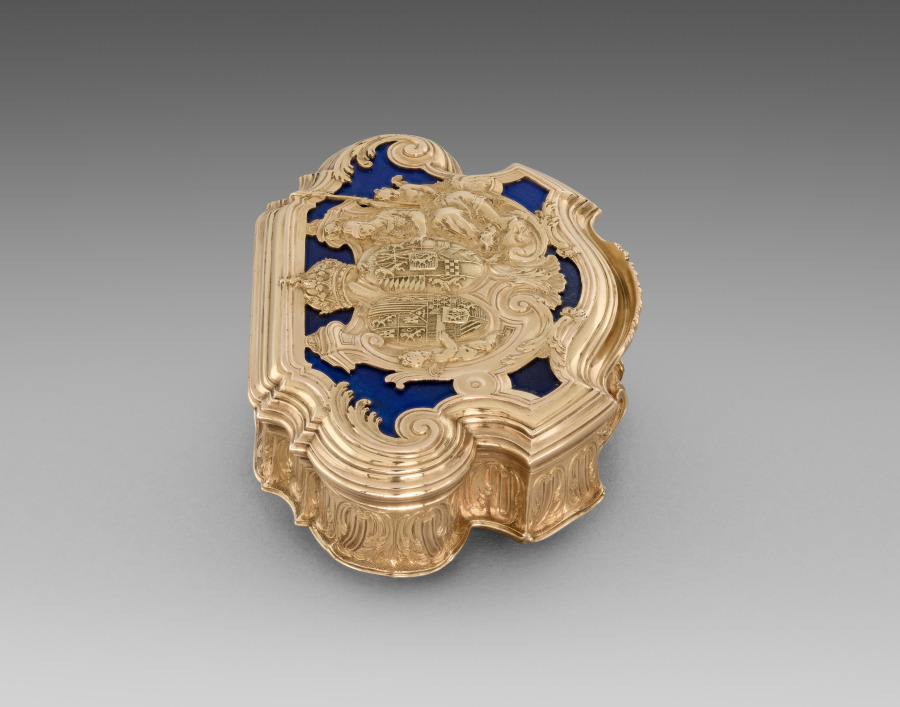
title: Gold Box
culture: France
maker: Juste-Aurèle Meissonnier (French, 1695–1750)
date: 1728–29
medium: gold and lapis lazuli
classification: Metalwork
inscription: IOM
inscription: a crowned M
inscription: a crowned dolphin's head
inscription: a crowned chancellor's mace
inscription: double frame eagle's head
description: With its central cartouche, heavy molding, and fluted sides, the design of this box attests to Juste-Aurèle Meissonnier’s interest in architecture. The box is further distinguished by a strong sense of movement, achieved through its dynamic contour, extraordinary level of detail, and the dramatic contrast between gold and lapis lazuli. Such small boxes, known as snuffboxes, were used to hold scented powdered tobacco that was inhaled through the nostrils. Made of precious materials and highly ornamented, they conveyed the owner’s wealth, fashion awareness, sophistication, and social standing. These personal, collectible items were often presented as luxurious gifts. This box was made for the dowager Queen of Spain, Maria Anna of Neuburg, whose coat of arms – along with that of her late husband, Charles II – features on the cover.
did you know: This is one of the two known objects that bear the maker's mark of Meissonnier.